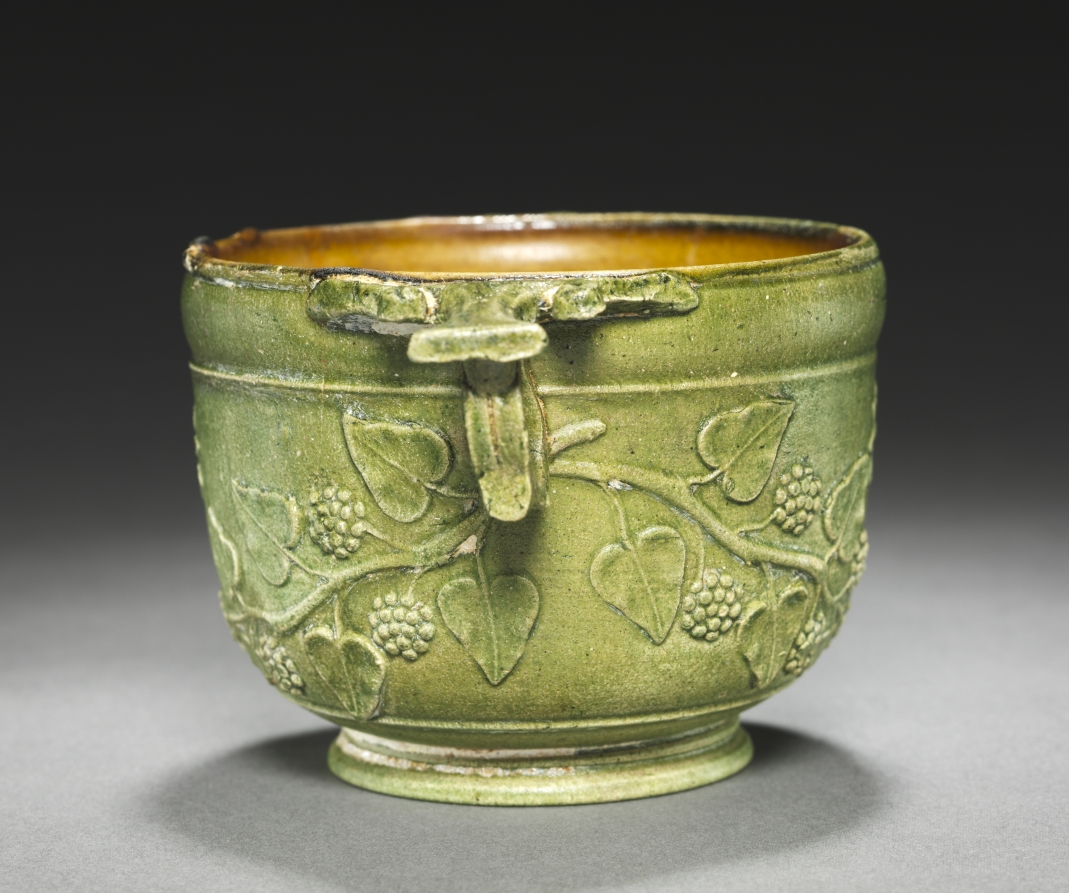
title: Skyphos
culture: probably Turkey, Roman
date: 1–100 CE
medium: earthenware with slip decoration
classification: Ceramic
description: Lead glaze was first used near the Mediterranean basin around 1000 bc, appearing in Mesopotamia and Egypt almost simultaneously. The technique flourished during the Roman Empire, and examples can be found in all reaches of the realm from England and Germany to North Africa, Syria, and Turkey, and perhaps even further east. This is a very fine example of this technique.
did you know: Lead glaze is what gives this wine cup its yellowish-green color.